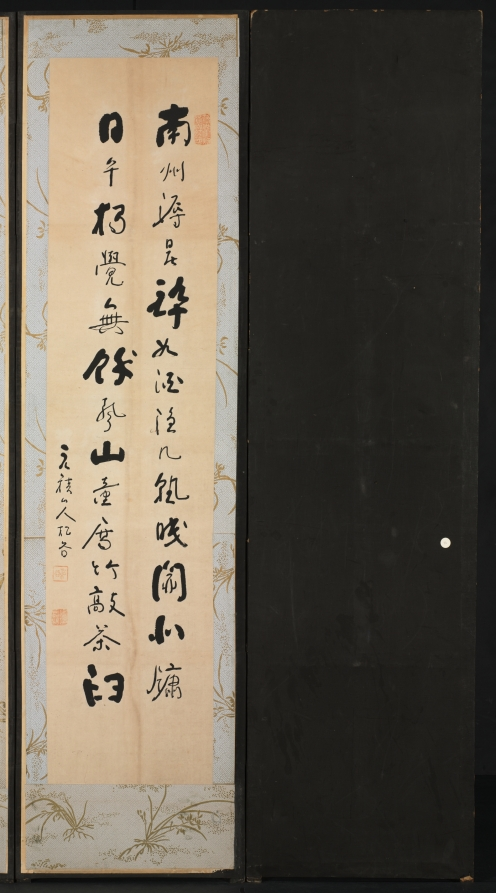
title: Painting of One Hundred Themes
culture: Korea, Joseon dynasty (1392–1910)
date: late 1800s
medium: Ten-panel folding screen affixed with album leaves (obverse), calligraphy (reverse), ink and color on silk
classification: Painting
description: The front of this screen features an assortment of subjects: birds and flowers, landscapes, and scenes of everyday life, mostly in monochromatic ink with light colors. The screen’s reverse side conveys a number of classical poems about the fleeting beauty of the four seasons. Traditionally, only one side of a folding screen bears painted or embroidered images, since these were used as a background furnishing. In Korean houses by the 1800s and early 1900s, however, two-sided folding screens became noticeably popular, possibly inspired by Japanese double-sided folding screens, which mainly served as room dividers in Japanese households.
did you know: The way of displaying small images of various subjects became one of the most popular type of painting toward the end of the 19th century.